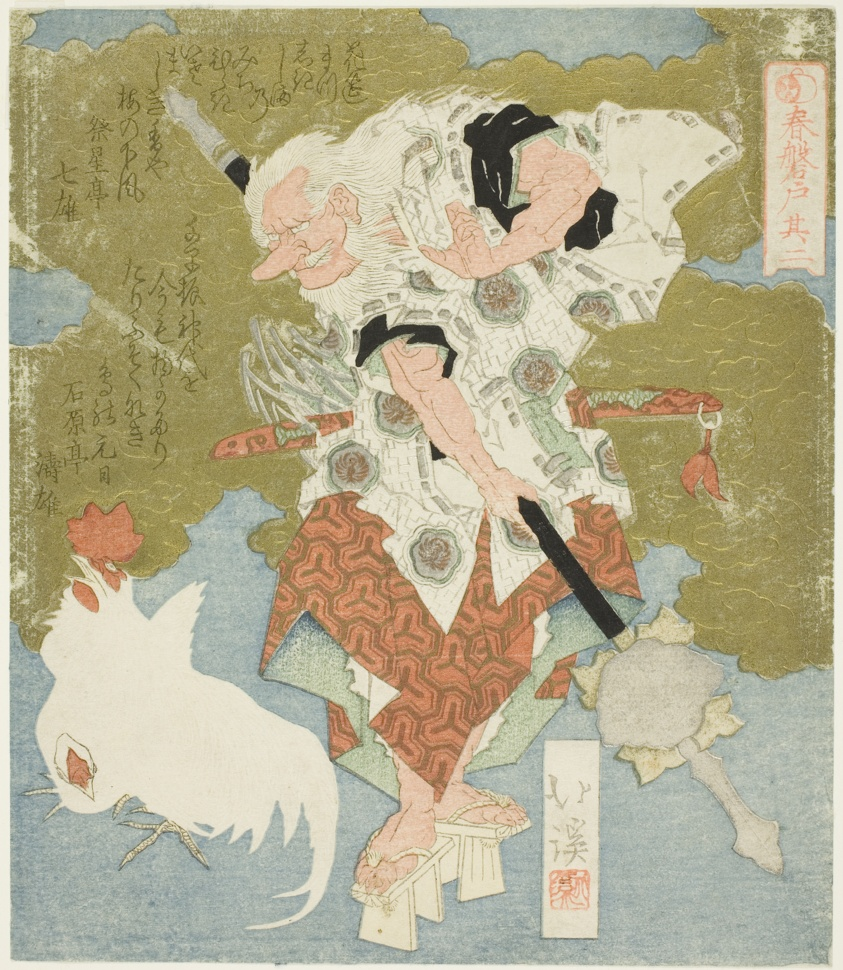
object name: Print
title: Sarutahiko, No. 2 (Sono ni) from the series "The Boulder Door of Spring (Haru no iwato)"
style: Japanese (culture or style)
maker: Totoya Hokkei (Japanese, 1780-1850)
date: 1820s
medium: Color woodblock print; shikishiban, surimono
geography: Japan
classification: woodblock print; print; asian art